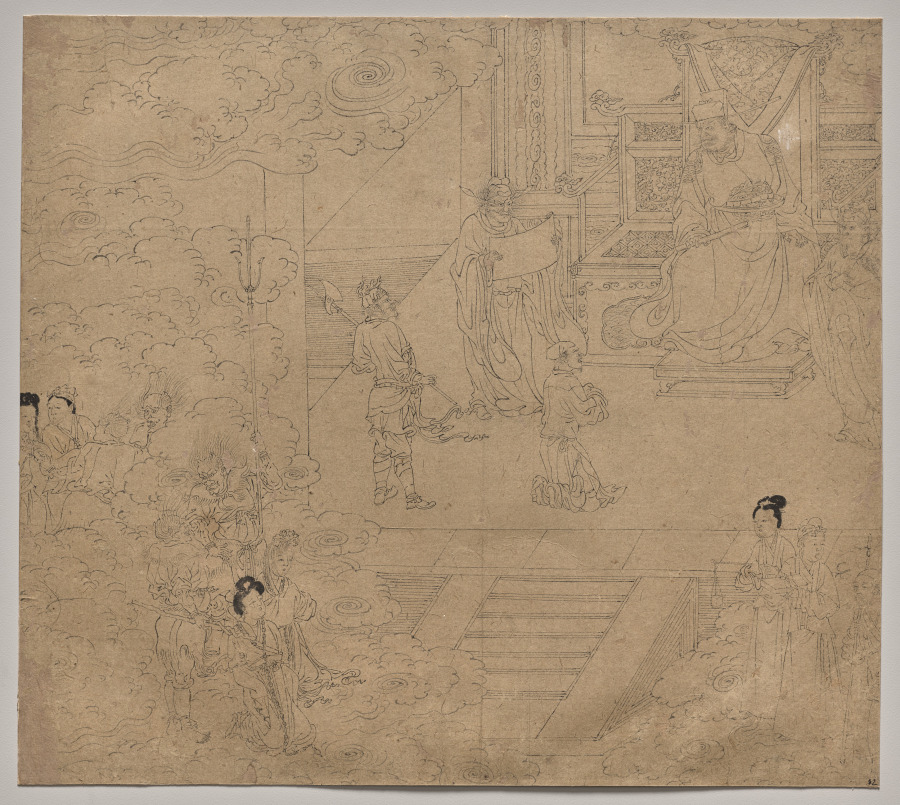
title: Album of Daoist and Buddhist Themes: Kings of Hells: Leaf 32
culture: China, Southern Song dynasty (1127-1279)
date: 1200s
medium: Album, ink on paper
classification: Painting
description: This extraordinary album has 50 paintings on a variety of religious subjects. They were likely created by several master craftsmen to share with studio apprentices as models for fulfilling commissions. The Jade Emperor and the Daoist pantheon make up the first 26 leaves. The next 14 leaves portray the Buddhist Ten Kings of Hell administering punishments to the dead. The third section, called “Clearing the Mountains,” features divine soldiers, led presumably by the deity Erlang Shen 二郎神, fighting undesirable creatures.